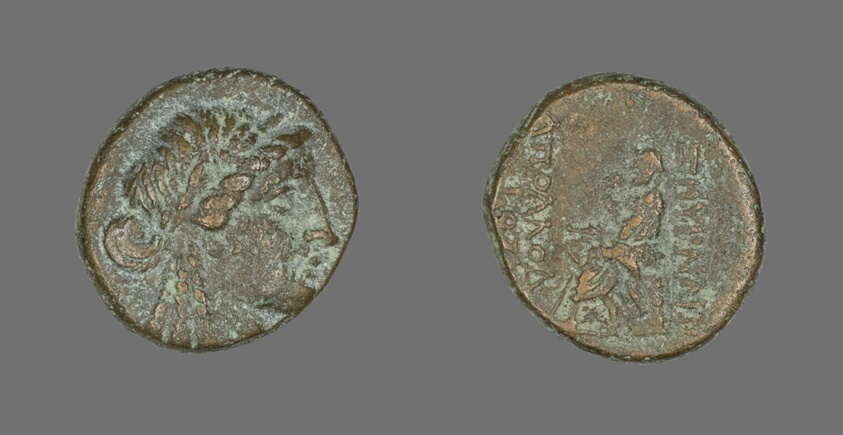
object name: Coin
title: Coin Depicting the God Apollo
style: greek, ancient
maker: Greek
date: 2nd-1st century BCE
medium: Bronze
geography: Ancient Greece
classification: coin; ancient art